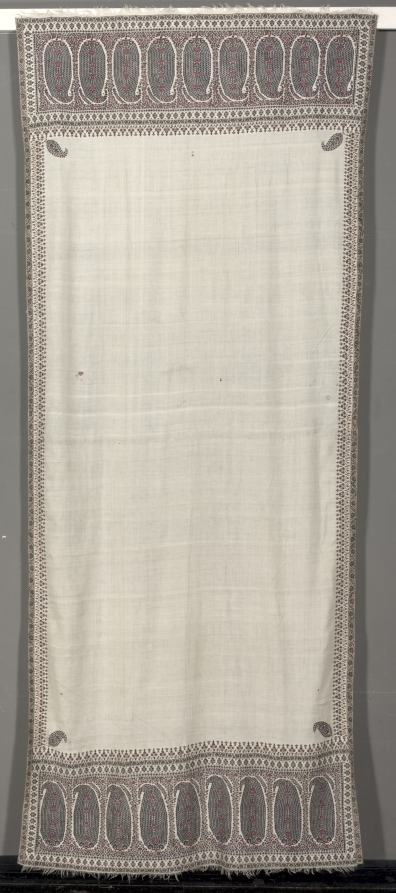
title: Long Shawl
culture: India, Kashmir, 19th century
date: c. 1815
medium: 2/2 twill tapestry weave, double interlocked; embroidery; wool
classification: Textile